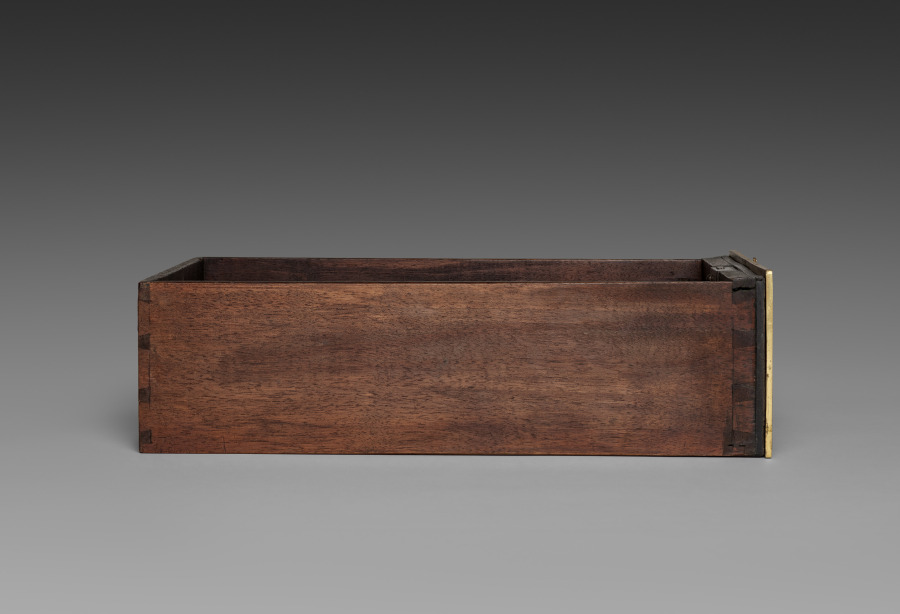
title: Side Drawer for Cabinet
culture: France, late 17th Century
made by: André-Charles Boulle (French, 1642–1732)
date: c. 1690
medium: ebony, marquetry in metal and tortoise shell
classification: Furniture and woodwork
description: Appointed cabinetmaker to King Louis XIV in 1672, André-Charles Boulle became a master of furniture making in France during the late 1600s until his death in 1732. Known primarily for his use of marquetry, in which metal patterns are inlaid into tortoiseshell then applied within the veneered surface of the furniture, Boulle established a level of quality and craftsmanship few others could achieve. As a result, his work found favor at the royal court and among other aristocrats and diplomats eager to impress the king. The inclusion of a medallion depicting Louis XIV within the bronze decoration of this chest would have identified the owner with the royal court. Often exhibiting stout architectural proportions with elegant groups of inlaid motifs such as the parrot on the central panel of this chest, Boulle’s designs are an example of the intellectual fashion for contrasting ideas, materials, and motifs.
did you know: Originally designed to sit atop an elaborate tall stand, this chest was likely altered in the late 1700s to reduce its scale and height.